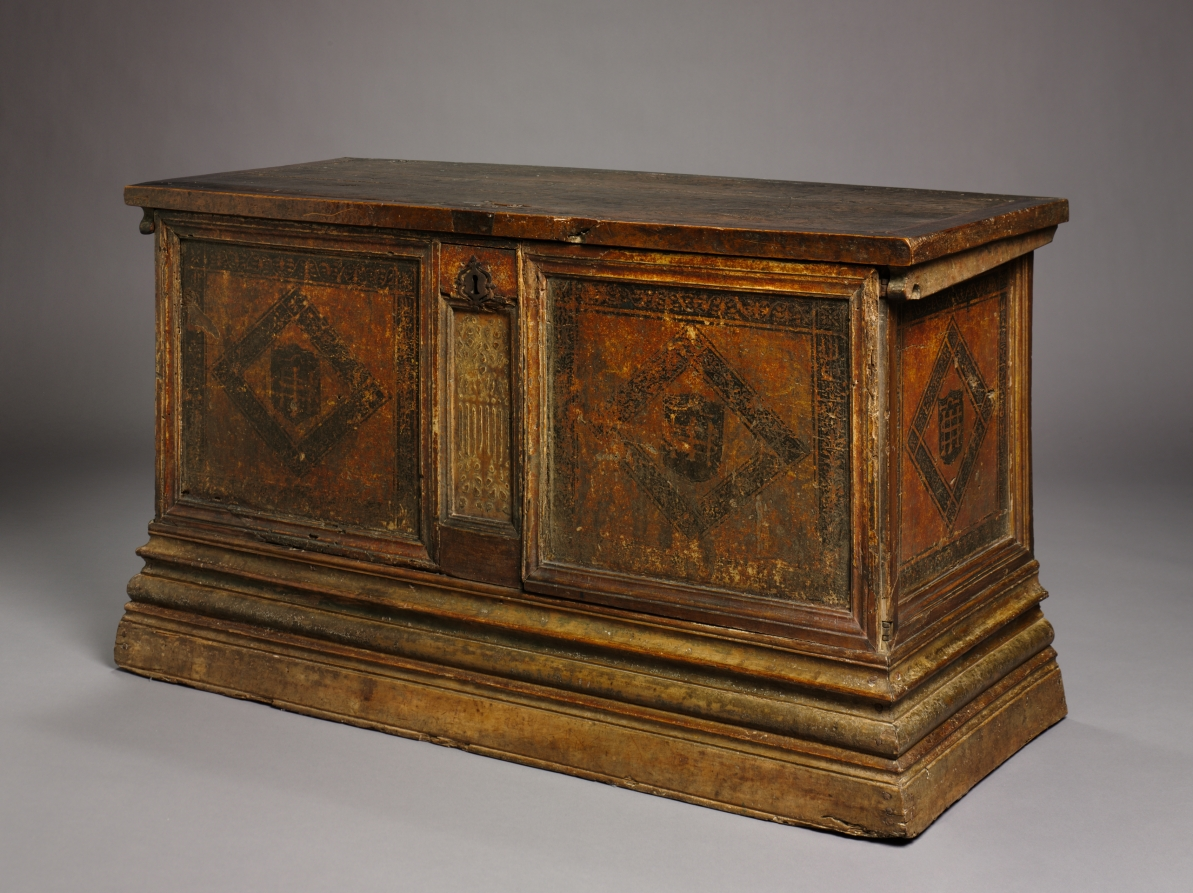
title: Gothic Marriage Chest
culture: Spain, Catalonia, Barcelona(?), 16th century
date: c. 1500–1525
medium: wood with painting and gilding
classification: Furniture and woodwork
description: These elaborately carved chests were given by husbands to their wives on the occasion of their wedding. Inside the home such chests were used for the storage of clothing and were elaborately painted and gilded. These chests are examples of a type produced in Barcelona from the late 1400s onward.